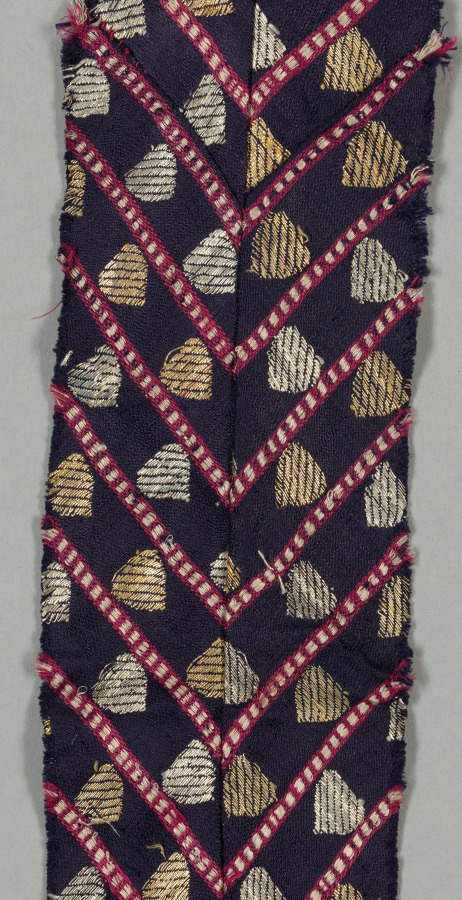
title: Fragment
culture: India, 19th century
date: 1800s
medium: brocade; silk and metal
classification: Textile